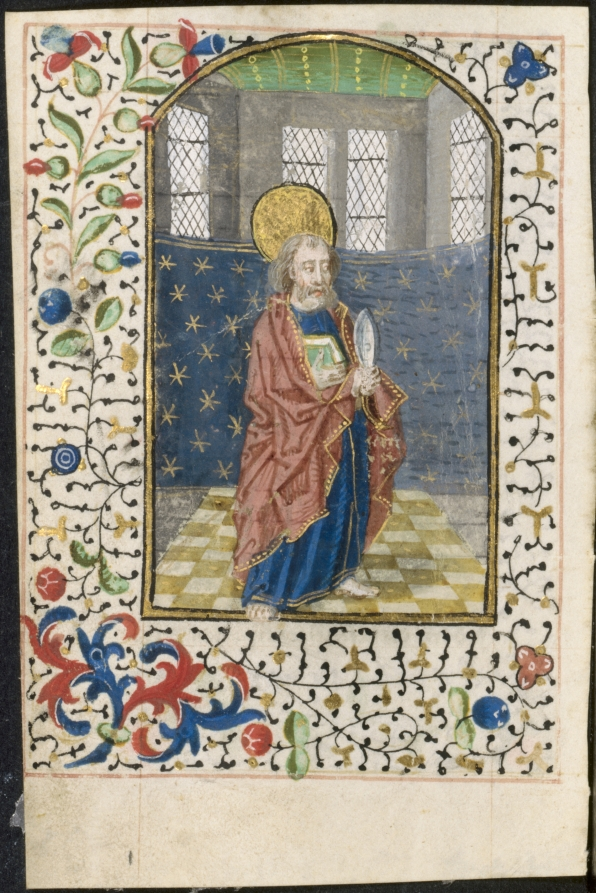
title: Leaf from a Book of Hours: St. Bartholomew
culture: Flanders, Bruges (?), 15th century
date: c. 1440–1460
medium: ink, tempera and gold on vellum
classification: Manuscript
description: Little is known of the life or acts of Saint Bartholomew, one of the twelve apostles. The Golden Legend records the tradition that Bartholomew preached in India and Armenia after Christ’s resurrection. It was in Armenia that the saint was martyred by being flayed alive. His attribute in art, as shown here, is typically a knife, the instrument of his death. The saint is shown standing within an architectural interior with a paneled ceiling, leaded windows, tiled floor, and a hanging cloth embellished with stars. The artist has not yet been identified, though his slightly expressionistic style and jagged, irregular drapery folds, as well as the border decoration, are typical of Flemish manuscript painting around the mid-1400s.